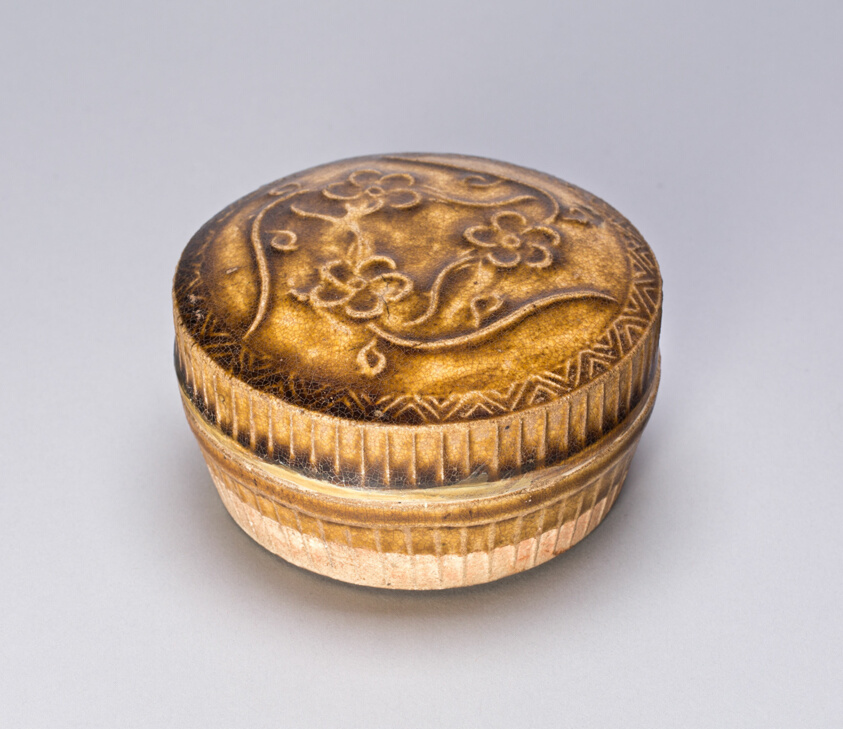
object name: Vessel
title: Covered Cosmetic Box with Floret Scrolls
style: Chinese (culture or style)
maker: China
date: Song (960–1279) or Yuan dynasty (1279–1368), c. 12th/13th century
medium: Jizhou-type ware; stoneware with olive-brown glaze and underglaze molded decoration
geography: China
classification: ceramics; vessel